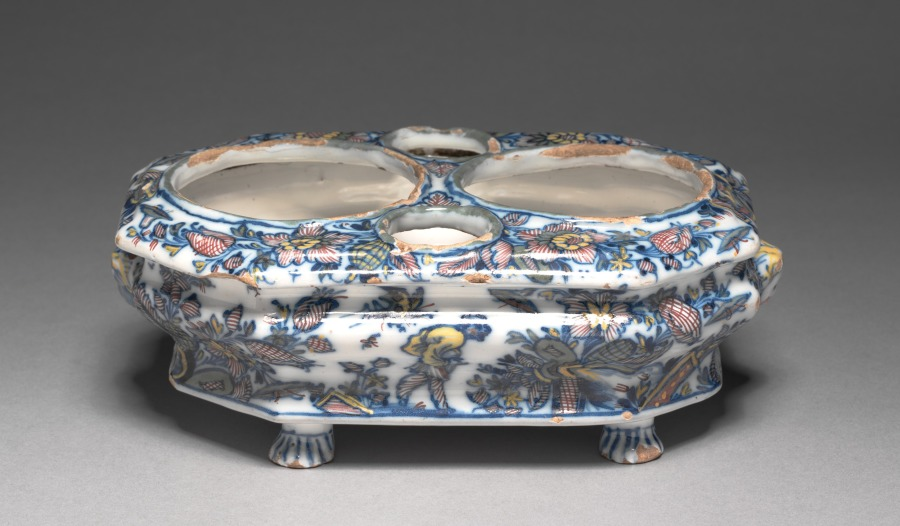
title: Cruet Stand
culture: France, Marseilles, 18th century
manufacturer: Héraud- LeRoy Factory (French)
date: c. 1740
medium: Tin- glazed earthenware (faience) wth underglaze blue decoration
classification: Ceramic